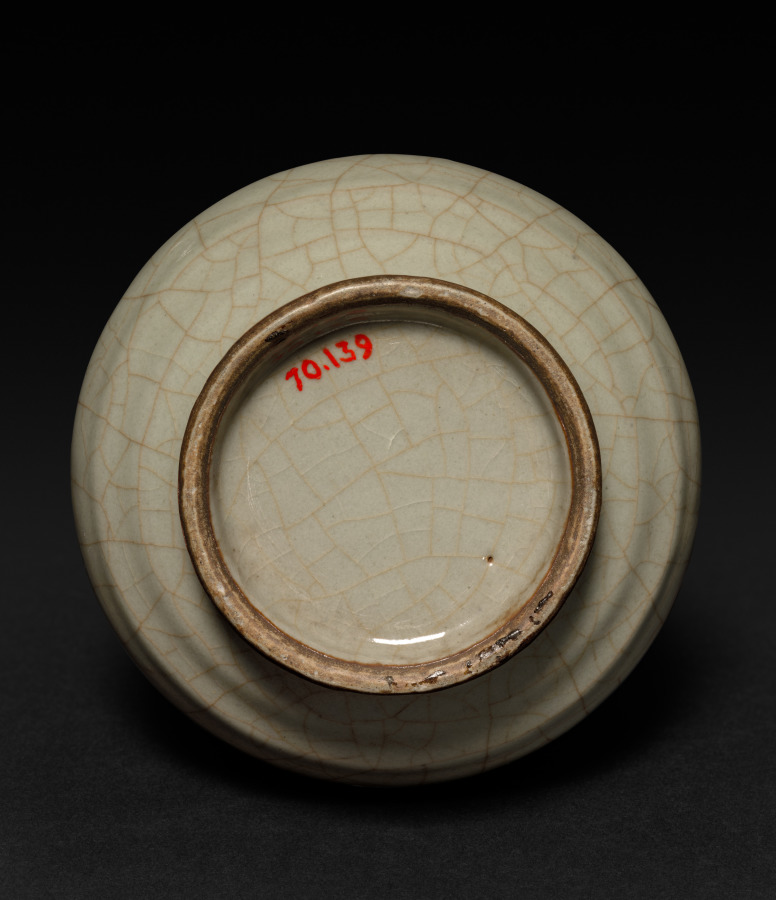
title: Vase: Guan type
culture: China, Qing dynasty (1644-1911)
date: 1700s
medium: porcelain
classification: Ceramic